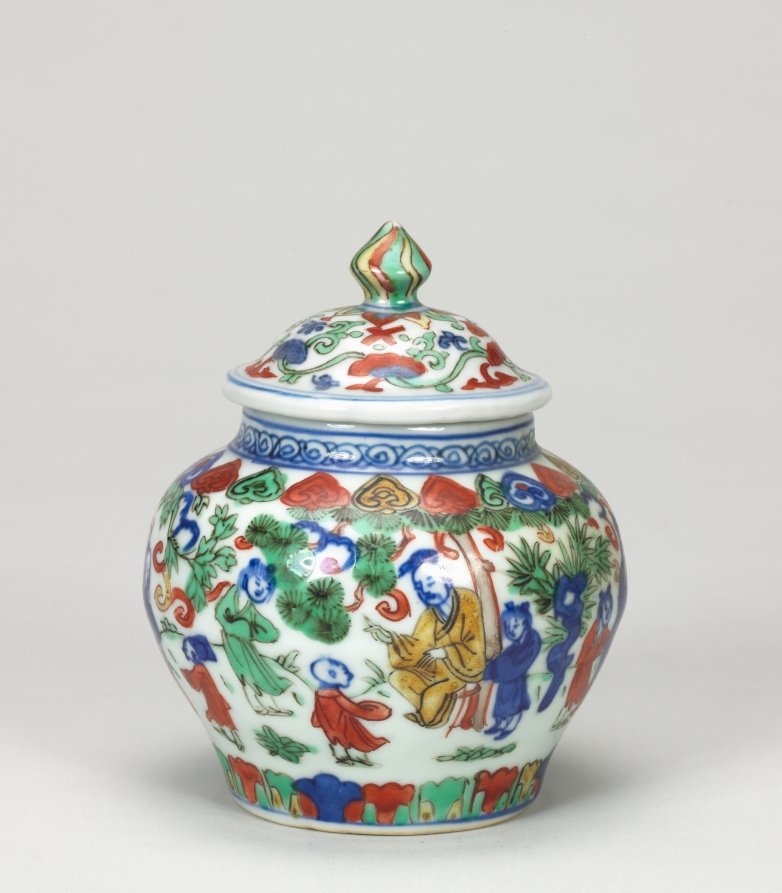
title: Covered Jar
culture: China, Jiangxi province, Jingdezhen kilns, Ming dynasty (1368-1644), Wanli reign (1573-1620)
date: 1573–1620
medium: porcelain with blue underglaze decoration and overglaze enamels in red, green, and yellow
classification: Ceramic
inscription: 大明萬曆年製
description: In the Ming (1368–1644) and Qing (1644–1911) dynasties, luxury items became more affordable to larger parts of the society, including women, merchants, and literati in non-official positions. Imperial patronage and a growing urban population encouraged consumption of luxury goods and local craftmanship. This covered porcelain jar has blue underglaze and overglaze in red, green and blue enamels. It shows Ming dynasty advancements in porcelain decoration and the creative mind of the talented artisans who made it.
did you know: This jar is painted with 16 figures of all ages enjoying a garden setting.